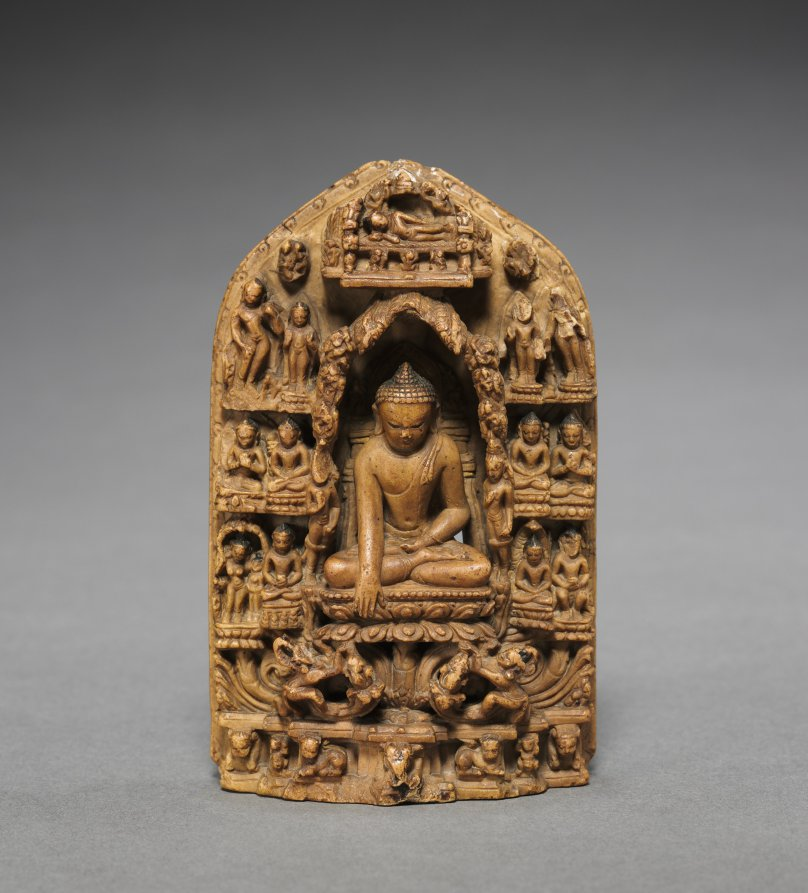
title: Shakyamuni Buddha Calling the Earth to Witness his Enlightenment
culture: Northeast India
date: 1000–1100s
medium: Kaolin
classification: Sculpture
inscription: At the top: Om muni muni mahamuni Shakyamunya svaha. Below: Ye dharma hetu prabhava hetu tesam tathagata hya vadat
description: Carved in a soft stone that approximates ivory, the central image of the historical Buddha at the moment of his enlightenment is surrounded by scenes from his own life, including his death at the top. The scenes are arranged not strictly chronologically, but aesthetically, such that the scenes where he is standing or seated are paired. A prayer written in a 12th-century Newari script indicates that this Indian sculpture was taken to Nepal. Buddhist travelers brought easily transportable personal devotional sculptures out of India to the Himalayas, where they served as models for local artists. Such works were valued abroad for their proximity to the source of Buddhism, founded in India during the 400s BC.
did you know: Kaolinite is a mineral that is actually a type of clay.